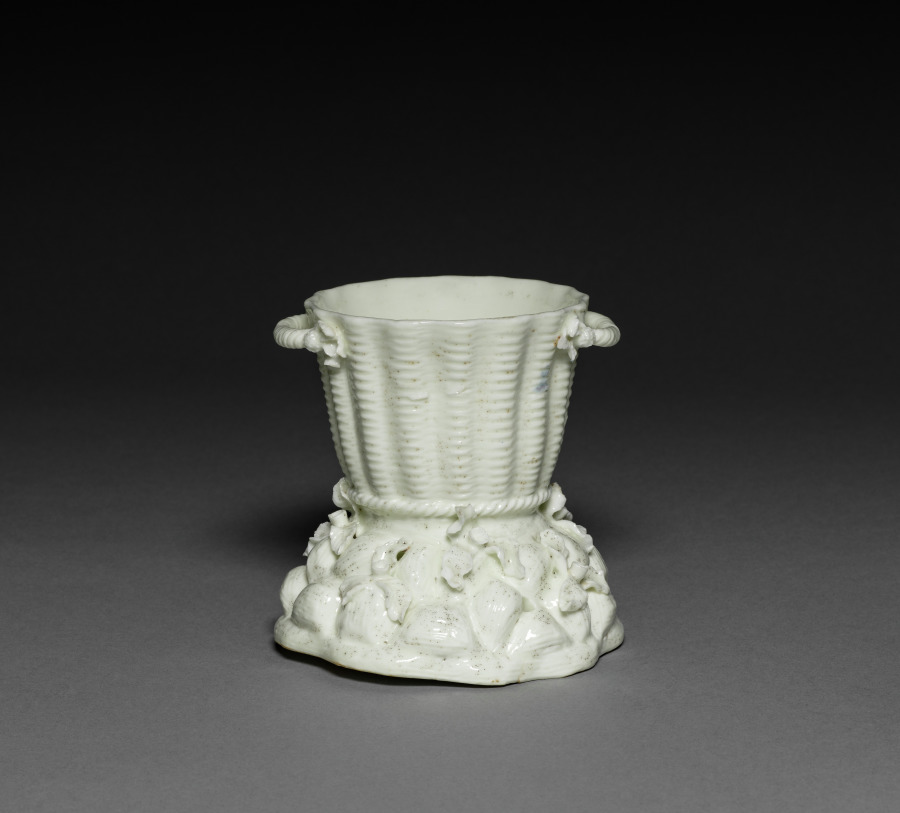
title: Potpourri Vase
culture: France, Saint Cloud, 18th century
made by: Saint Cloud Porcelain Factory (French)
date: mid 1700s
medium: soft-paste porcelain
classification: Ceramic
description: A vase like this was created to contain potpourri, a mixture of flowers, herbs, and spices emitting ambient fragrance. This specific function offered a particularly fertile ground for the development of French porcelain, as manufactories experimented with forms, surface ornamentations, and placement of perforations.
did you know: Prior to Saint-Cloud's development of soft-paste porcelain in the 1690s, rumors spread throughout Europe that the prized material was made by burying a variety of materials, including lobster shells, in the ground for 80 years.